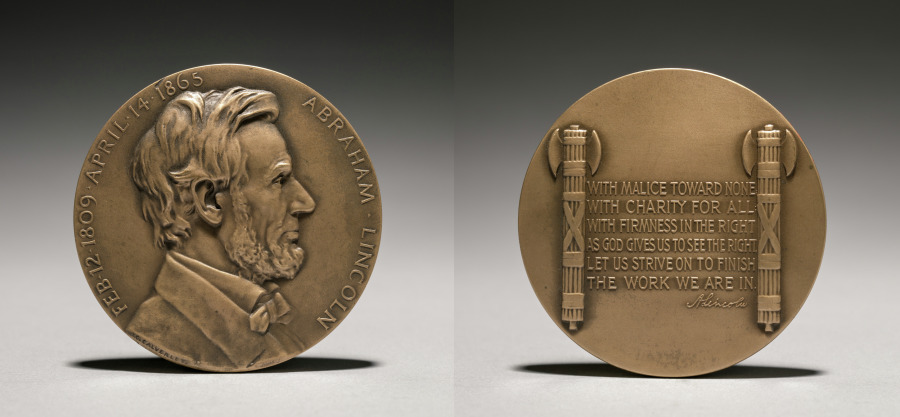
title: Abraham Lincoln Medal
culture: America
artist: Charles Calverley (American, 1833–1914)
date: 1900s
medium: bronze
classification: Metalwork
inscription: obverse - right-hand side: "FEB.12.1809 APRIL.14.1865"; left-hand side: "ABRAHAM LINCOLN." Below: "C. Calverley." reverse - "WITH MALICE TOWARD NONE/ WITH CHARITY FOR ALL/ WITH FIRMNESS IN THE RIGHT/ AS GOD GIVES US TO SEE THE RIGHT/ LET US STRIVE ON TO FINISH/ THE WORK WE ARE IN/ ALincoln [in ligature]."